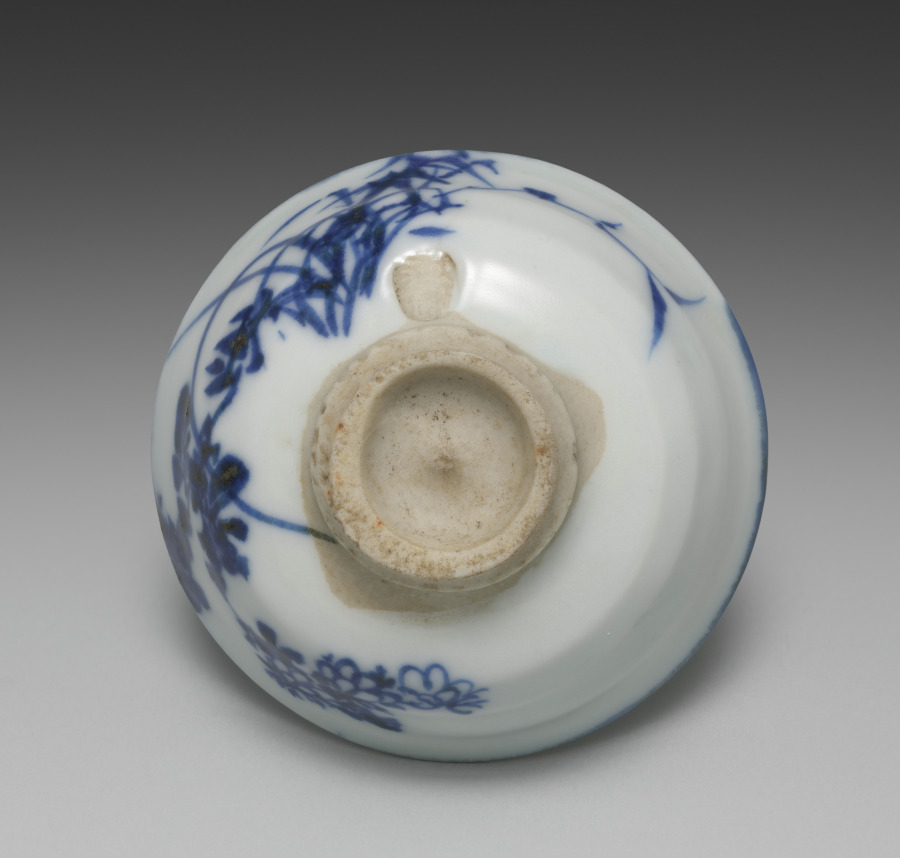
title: Sake Cup with Auspicious Plants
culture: Japan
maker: Seifū Yohei II (Japanese, 1844–1878)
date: 1861–78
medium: One of a pair of sake cups; porcelain with underglaze blue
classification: Ceramic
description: Seifū Yohei II excelled as a painter, as evidenced by his floral and landscape designs. His works were selected as the best among Kyoto ceramics shown to jurists from Europe and the US, thus paving the way for international recognition of the studio in the late 1800s.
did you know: Orchid, bamboo, chrysanthemum, and plum all appear on this cup and have associations with the four seasons.